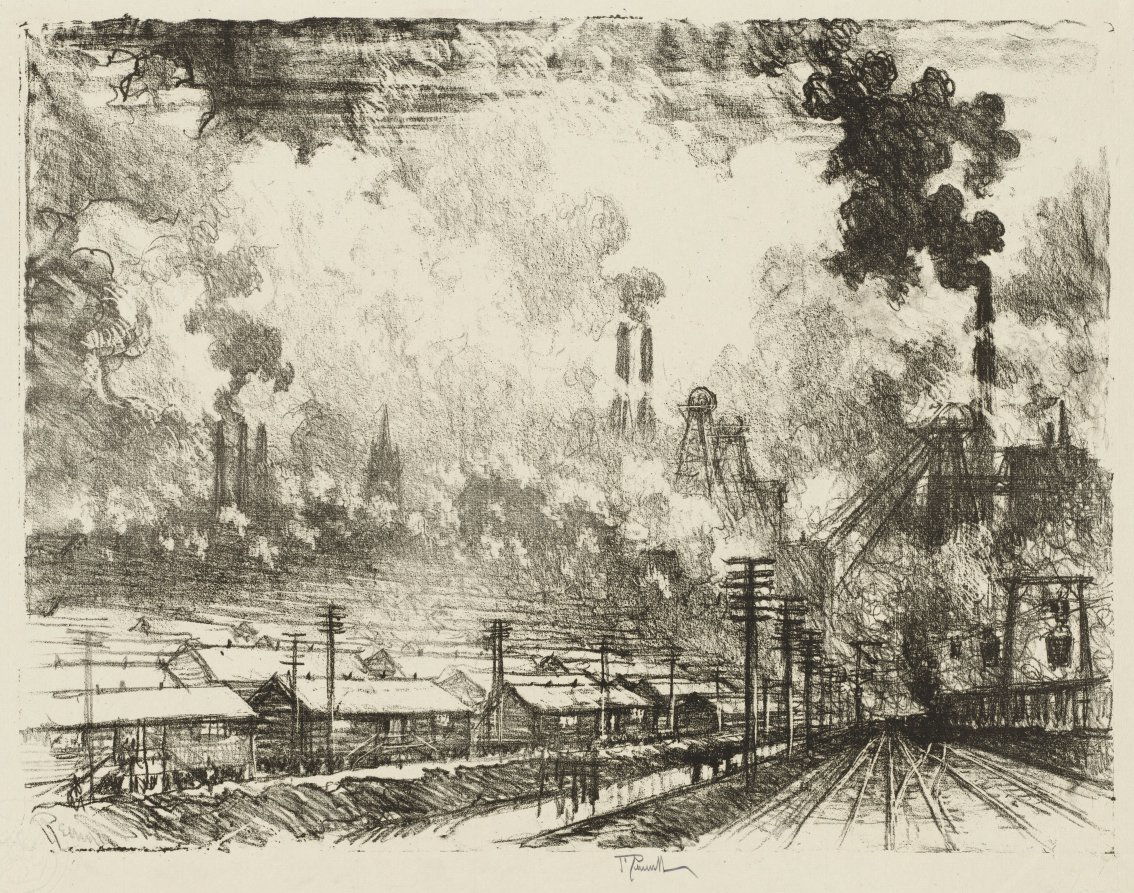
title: English War Work: The Coal Mines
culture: America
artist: Joseph Pennell (American, 1857–1926)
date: 1916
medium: lithograph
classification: Print